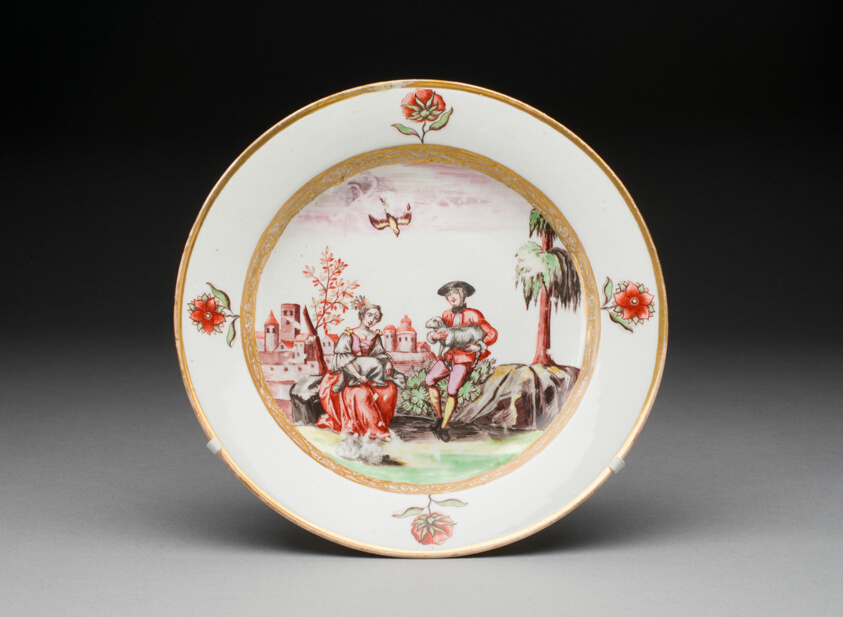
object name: Ceramics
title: Plate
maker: Meissen Porcelain Manufactory; German, founded 1710; Decoration in the style of Ferner or Meyer von Priesnitz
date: c. 1740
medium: Hard-paste porcelain, polychrome enamels, and gilding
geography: Meissen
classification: plate (general, dish); tableware; dish (vessel); porcelain; european decorative arts; ceramics